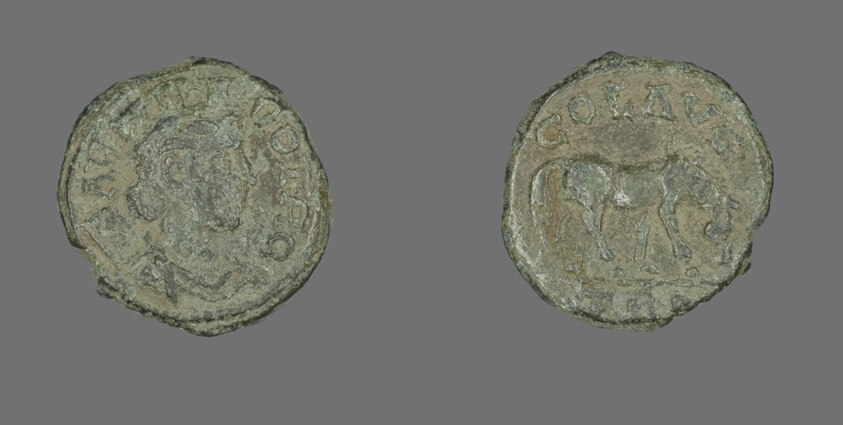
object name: Coin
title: Coin Depicting Tyche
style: roman (ancient, style or period), ancient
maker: Roman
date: 211-268 CE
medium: Bronze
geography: Roman Empire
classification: coin; ancient art